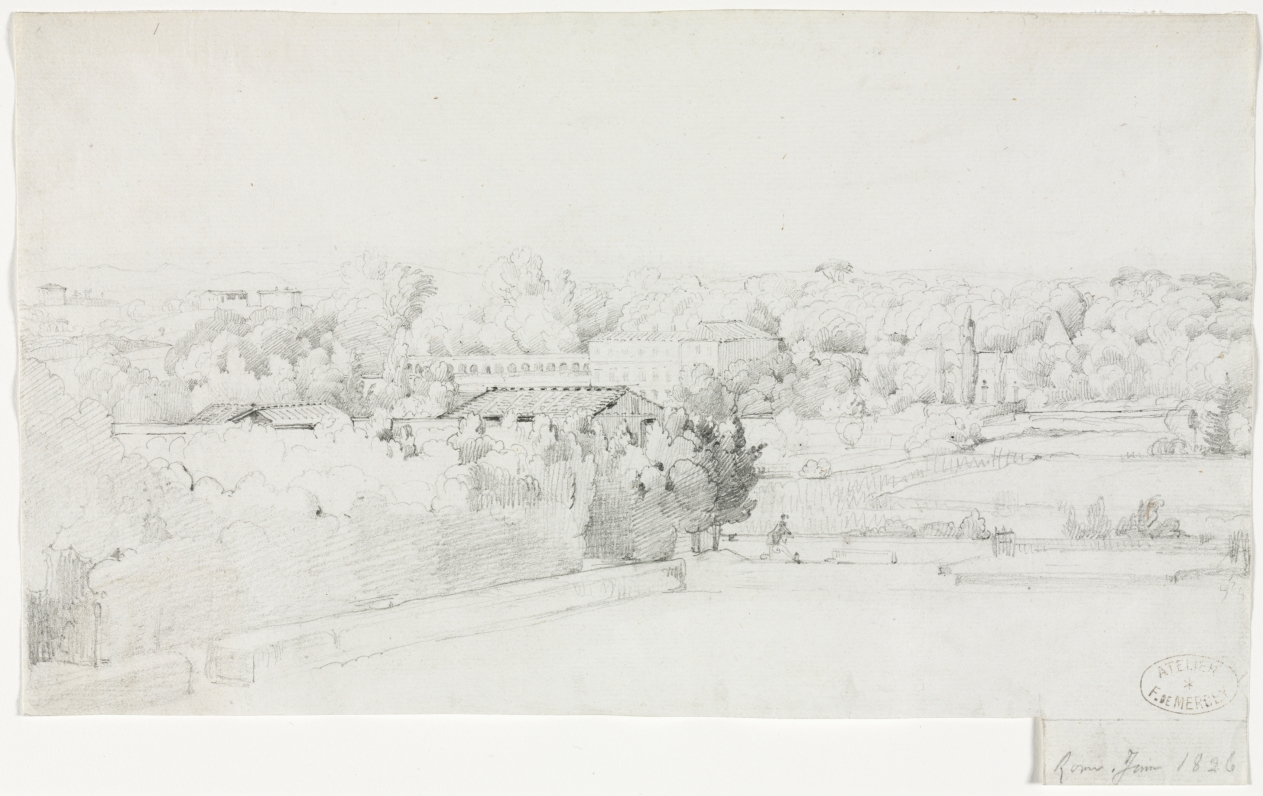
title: View of the Villa Borghese and its Orangerie from the Villa Medici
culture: France, 19th century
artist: Frederic Bourgeois de Mercey (French, 1805–1860)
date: 1826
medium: graphite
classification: Drawing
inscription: by artist, lower right, in graphite: Rome, Juin 1826 ; VERSO, upper right, in graphite: 3[9?] / 4W / TONG. / 33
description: The Villa Borghese and its grounds was a familiar sight to French artists because it bordered the Villa Medici, which housed the French Academy beginning in 1803. Both of these grand residences were located on Il Pincio, one of the seven hills of Rome. The term villa in the title refers to a princely house set in large gardens. An orangerie was an early type of greenhouse used to shelter tender plants, especially oranges, during the winter months.